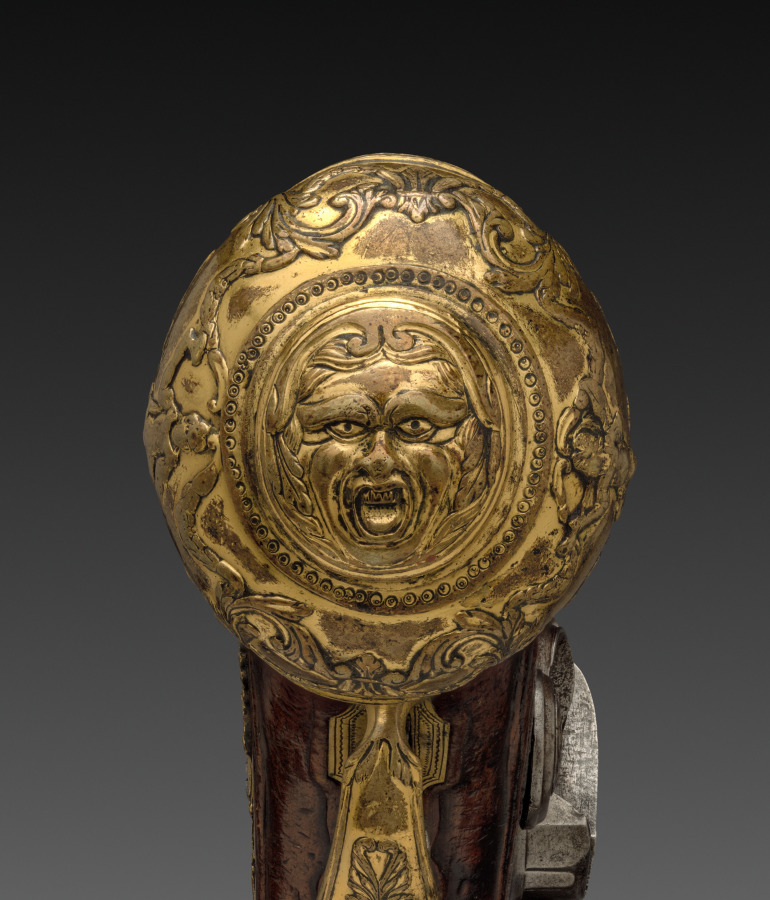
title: Flintlock Pistol (1 of 2)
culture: Franco-Flemish, Liège, early 18th century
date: early 1700s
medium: steel with gold inlay, gilt-brass mounts; walnut burl stock; chiseled high-relief decoration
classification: Arms and Armor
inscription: on barrel: G. MASSIN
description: The exquisite ornament along the breech of the barrel is chiseled and engraved. The barrel of this pistol is signed g. massin, the name of a gunsmith working in eastern France or French-speaking Flanders, possibly the city of Liège.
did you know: The flintlock ignition system was developed in the 1600s and remained the dominant system until the early 1800s.